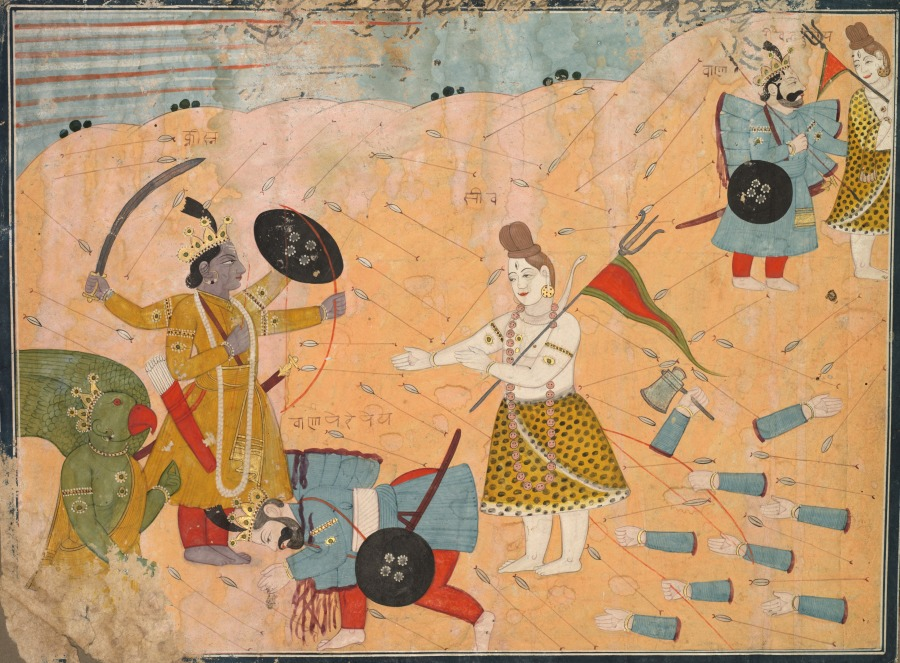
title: Shiva intercedes for King Bana, from an Usha-Aniruddha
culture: Northern India, Pahari kingdoms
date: c. 1840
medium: Gum tempera, ink, and gold on paper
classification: Painting